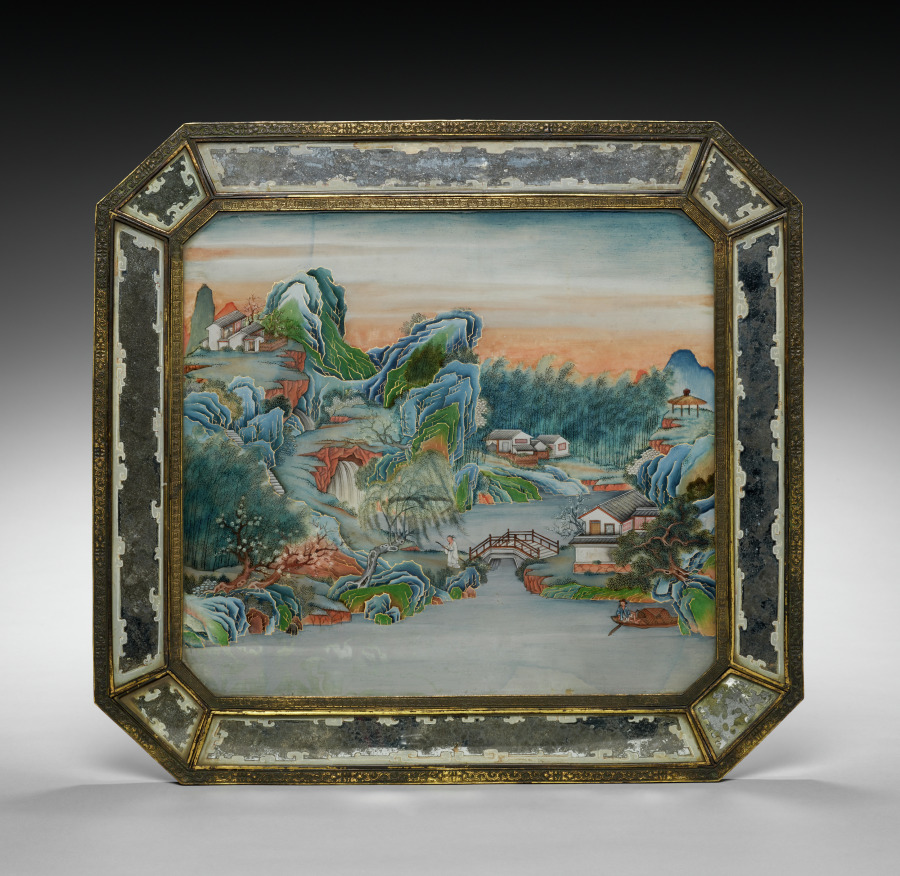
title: Screen with Landscape (reverse)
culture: China, Beijing palace workshops, Qing dynasty (1644-1911), Qianlong reign (1736-1795)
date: 1736–95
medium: painted enamel, glass painting, and cast-iron stand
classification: Enamel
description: The reverse side of this two-sided table screen is a glass painting of architectural landscape in the Chinese style. At the Qing court, imperial commands made possible artistic collaboration and the incorporation of different artistic expressions in a single artwork.